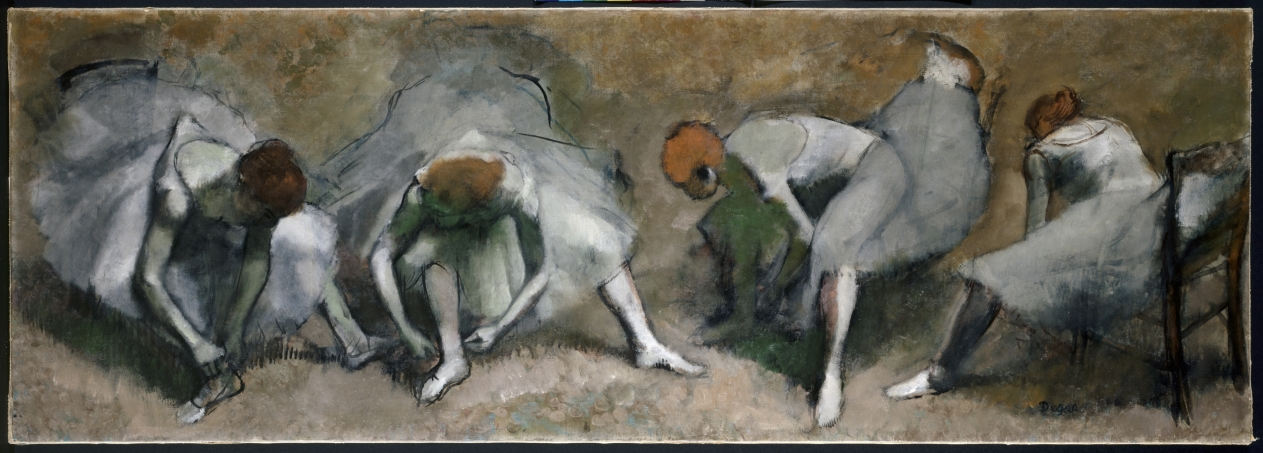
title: Frieze of Dancers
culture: France, 19th century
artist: Edgar Degas (French, 1834–1917)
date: c. 1895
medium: oil on fabric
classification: Painting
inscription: Signed in lower right: Degas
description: This painting may depict a single dancer seen from four different viewpoints. The young woman is placed in an undefined setting, surrounded by mere wisps of color, applied so spontaneously that the paint ran and dripped. Degas even added the circles in the foreground with his thumb. Such audacity, while acceptable in a small sketch, must have shocked the artist's contemporaries when presented on a six-foot canvas. Equally radical is the idea of combining multiple views of a single figure. Degas's unusual presentation may have been inspired by the photographs of Eadweard Muybridge (1830-1904)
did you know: The ballet is a subject Degas returned to again and again over the course of his career. Rather than public performances, he often depicted dancers behind the curtain, practicing, waiting, or, as in this painting, lacing up their shoes.